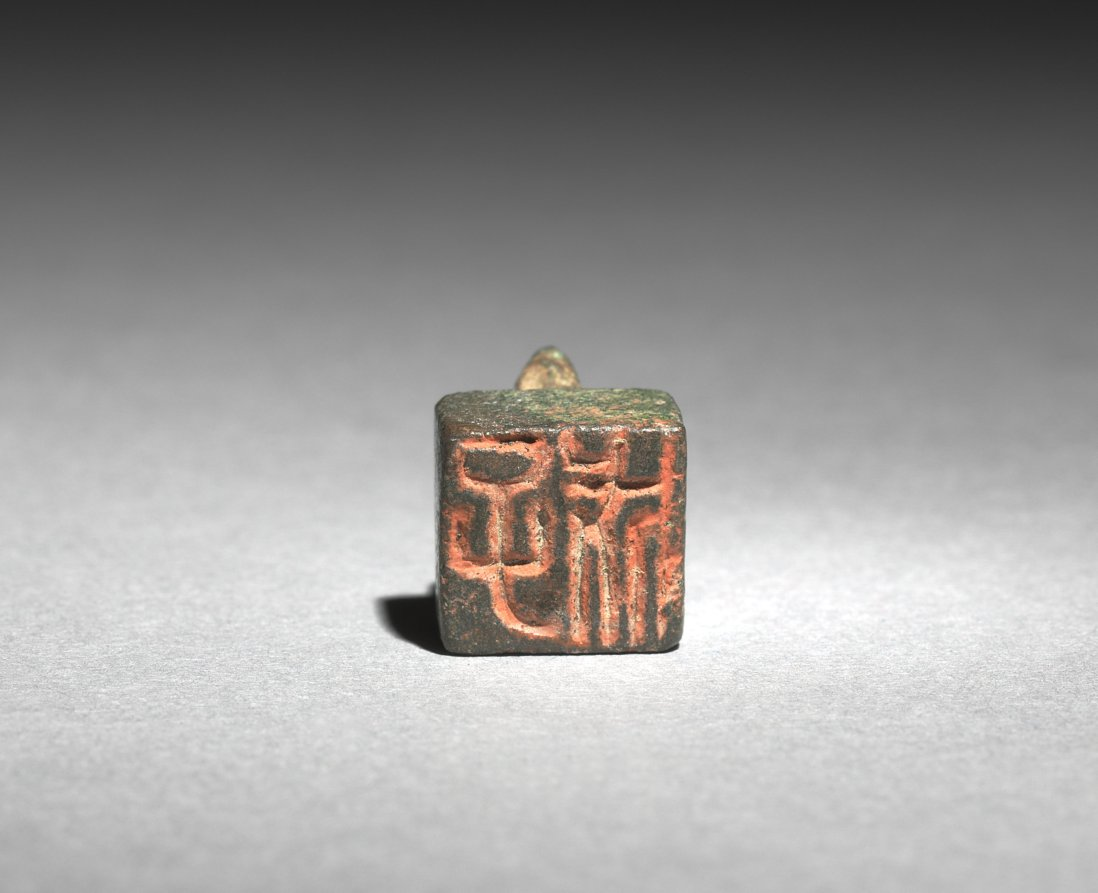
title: Seal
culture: Korea, Goryeo dynasty (918–1392)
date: 918–1392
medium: bronze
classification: Metalwork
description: A large quantity of bronze seals were excavated from tombs of the Goryeo dynasty. This seal bears two inscribed characters:子成, meaning "generational success." The red cinnabar paste is still visible, indicating it must have been used for signing various documents while its owner was alive.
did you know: A large quantity of bronze seals excavated from tombs of the Goryeo dynasty is closely related to the development of metallurgy in 13th-century Korea that allowed the transition from wood type to movable metal type printing.